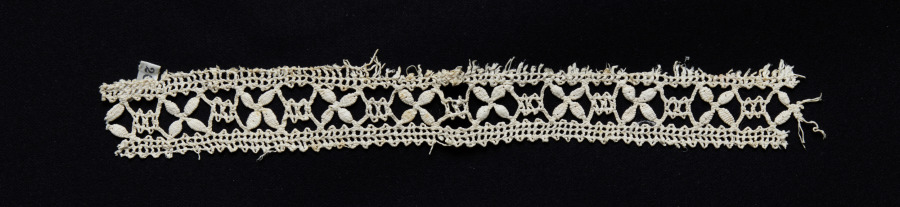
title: Lace Insertion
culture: Italy, Genoa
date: 1550–99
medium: Bobbin lace (needle lace, reticella design)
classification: Lace